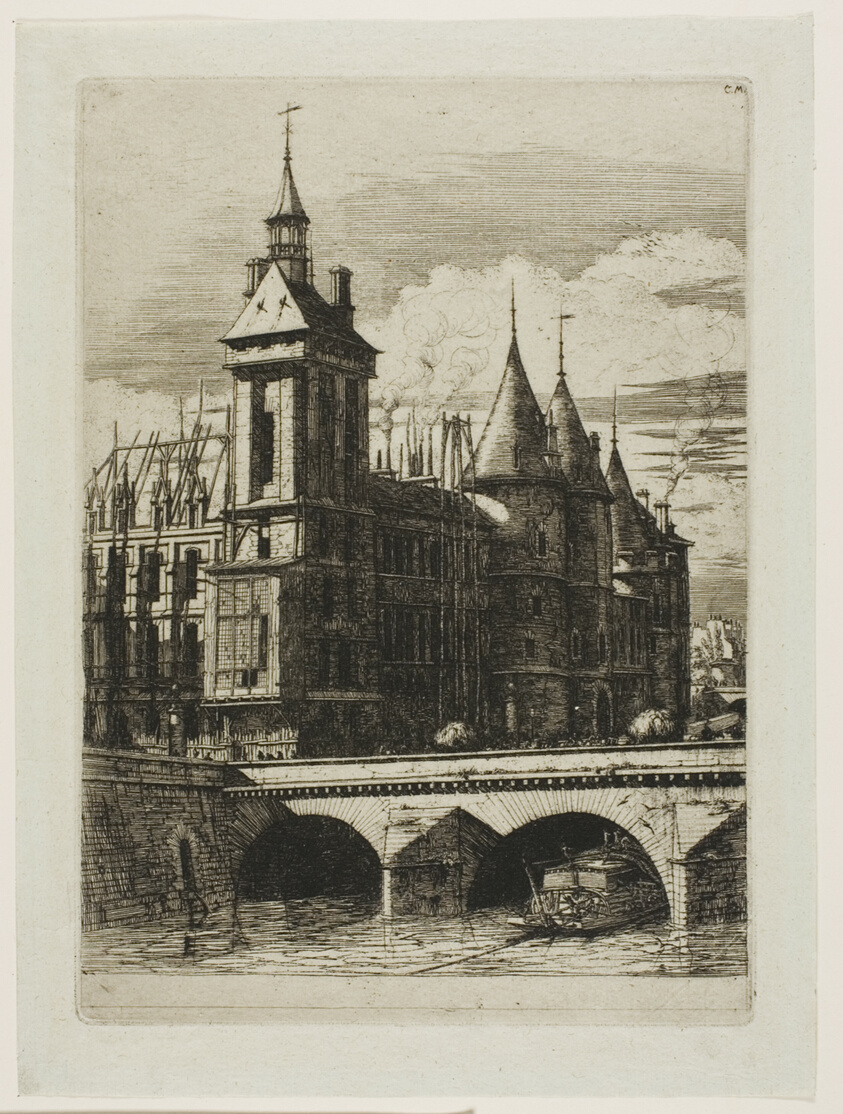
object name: Print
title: The Clock Tower, Paris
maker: Charles Meryon (French, 1821-1868)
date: 1852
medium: Etching and engraving on verdâtre (greenish) laid paper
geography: France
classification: etching; print; prints and drawing